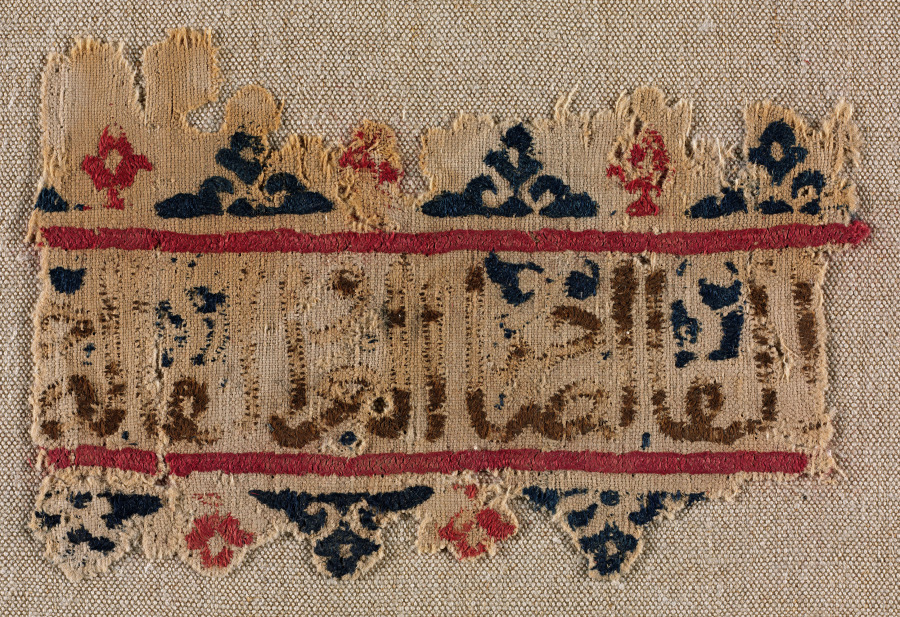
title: Fragment of a Tiraz-Style Textile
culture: Egypt, Mamluk sultanate (1250–1517)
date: 1200s - 1300s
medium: silk embroidery on linen tabby ground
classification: Embroidery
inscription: al-'izz wa-al-baqa' li-sahibihi (rest and long life to its possessor)